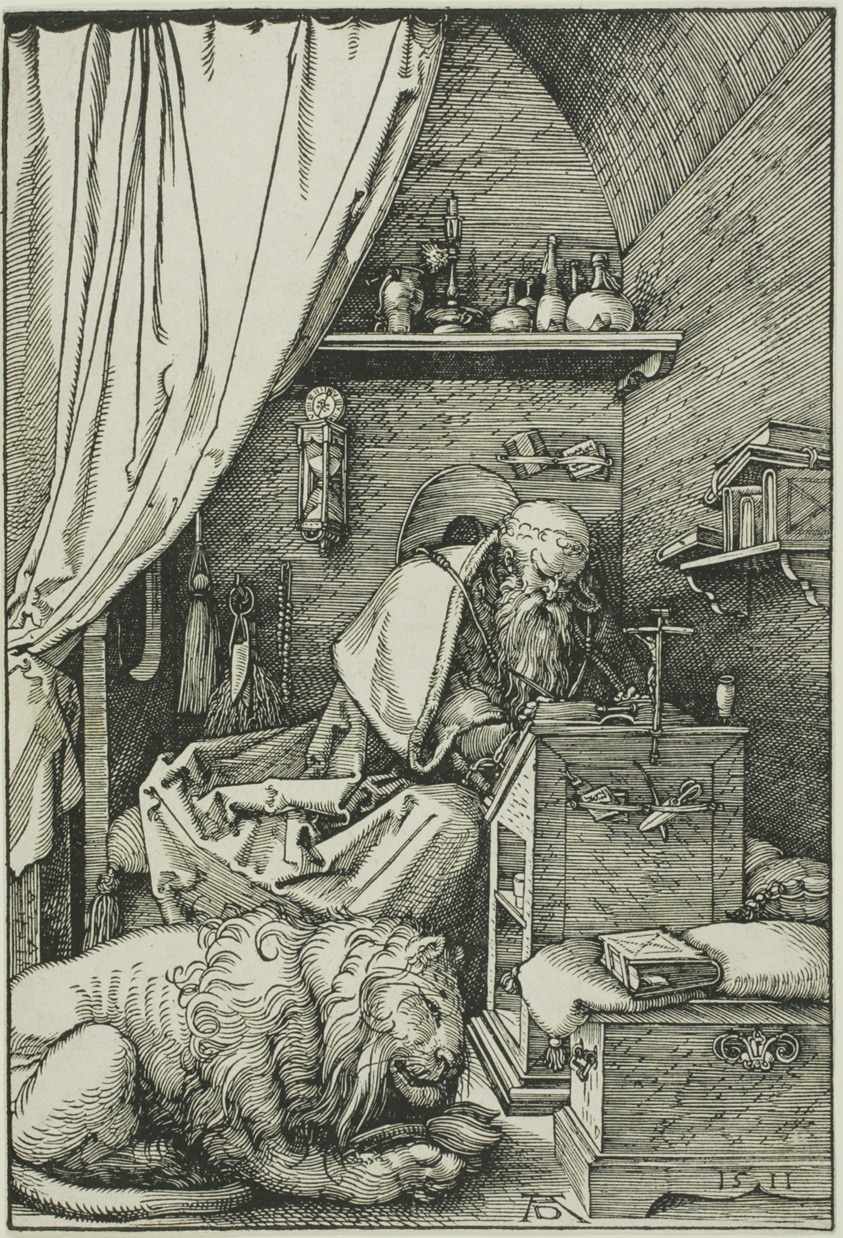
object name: Print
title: Saint Jerome in his Cell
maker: Albrecht Dürer (German, 1471-1528)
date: 1511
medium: Woodcut in black on ivory laid paper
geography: Germany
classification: woodcut; print; prints and drawing; paper